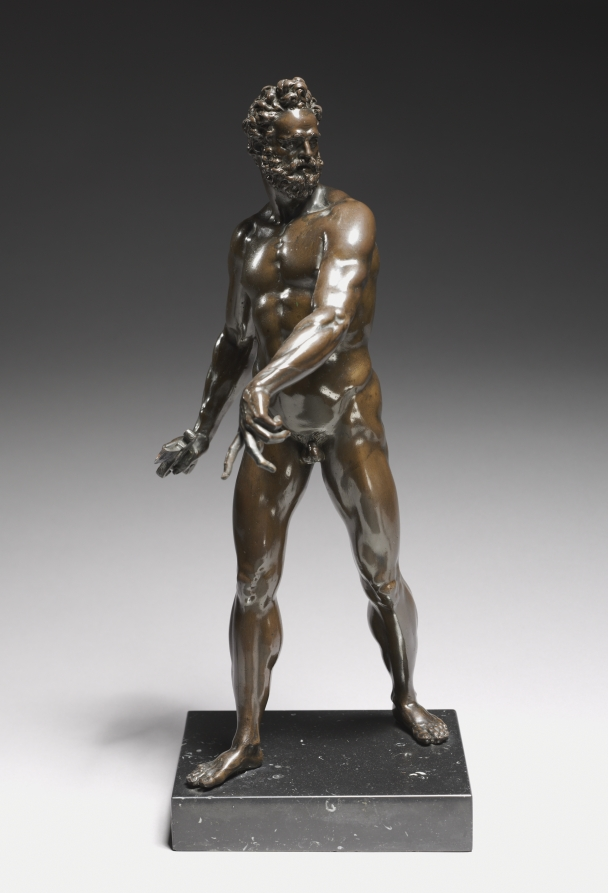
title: Mars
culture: Italy, 16th century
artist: Giambologna (Flemish, active Italy, 1529–1608)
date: c. 1584–87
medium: bronze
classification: Sculpture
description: Although he is lacking the helmet and armor common to Mars in Roman iconography, this figure is identified as the ancient god of war. Mars pauses mid-stride, swinging his sword arm back to strike an enemy in his gaze; this dynamic composition is typical of Giambologna’s models. Collectors prized small bronzes such as this and often kept them in special rooms along with antiquities, coins, shells, and other curiosities. Easy to hold and arrange due to their small size, they were appreciated through touch as well as sight.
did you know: The active, twisting pose indicates that the statue was designed to be viewed in the round.